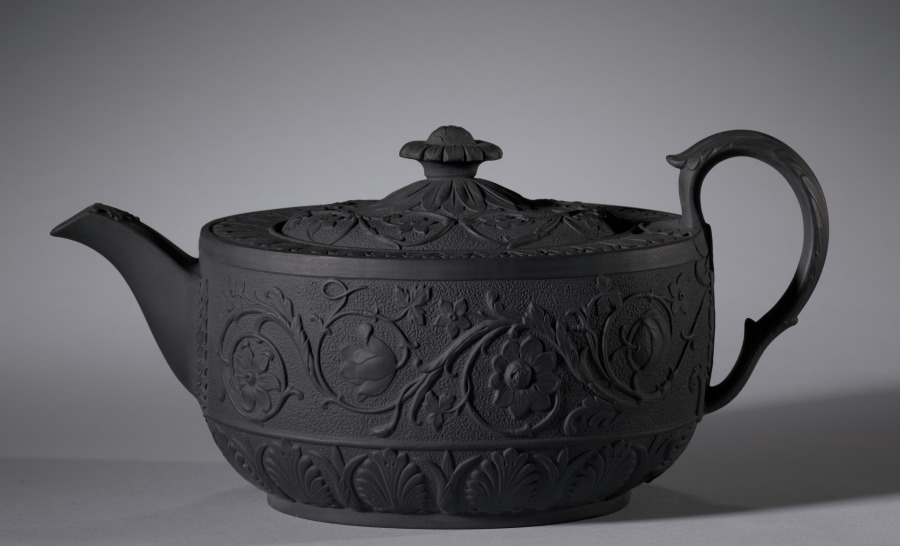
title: Teapot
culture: England, 19th century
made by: Elijah Mayer & Son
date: c. 1810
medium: black basalt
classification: Ceramic